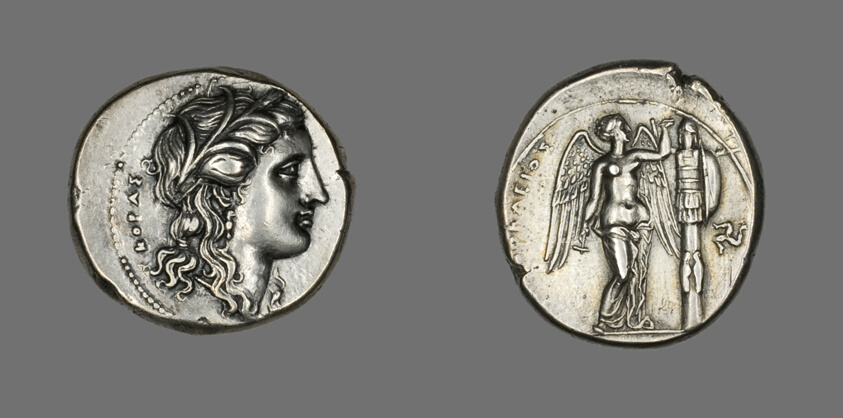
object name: Coin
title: Tetradrachm (Coin) Depicting the Goddess Persephone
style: hellenistic, ancient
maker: Greek, minted in Syracuse, Sicily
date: 310-307 BCE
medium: Silver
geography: Syracuse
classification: coin; ancient art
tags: goddesses, gods (deities)